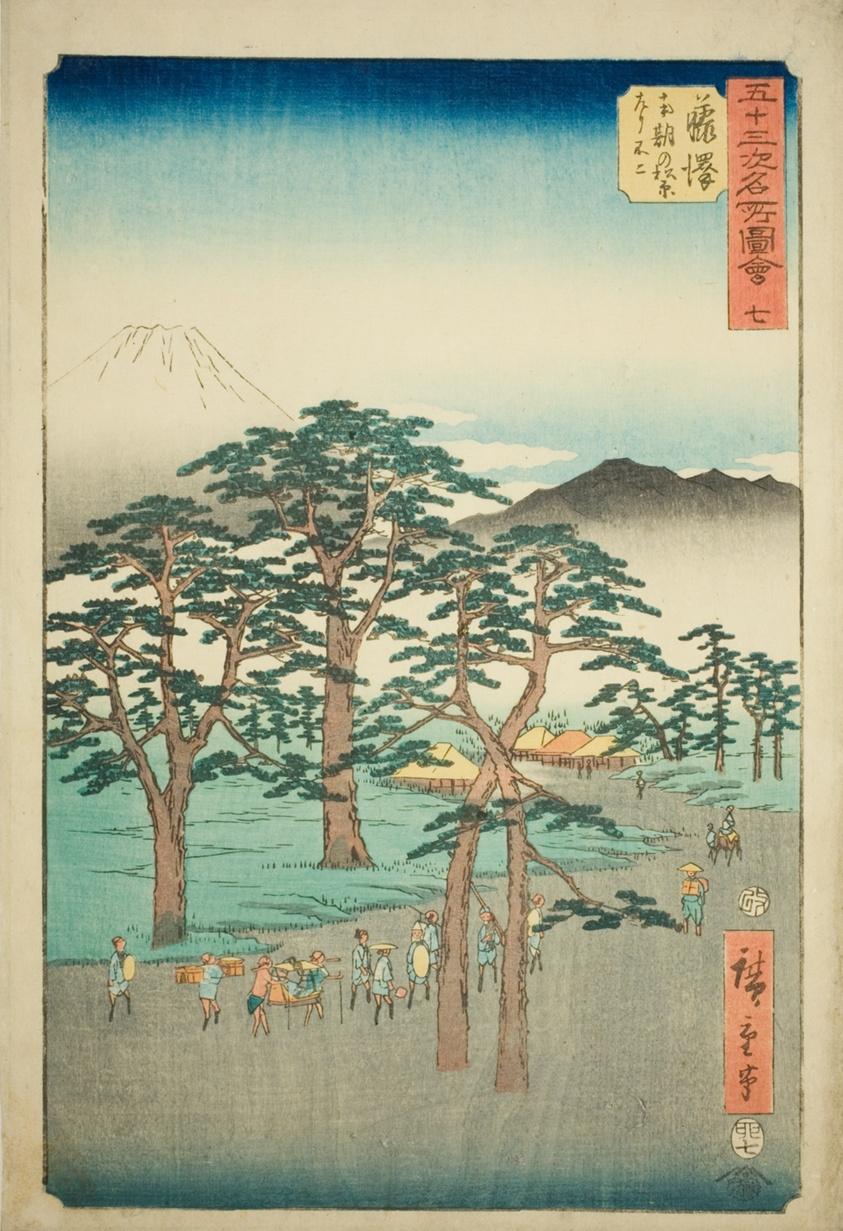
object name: Print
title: Fujisawa: Mount Fuji on the Left from the Nanki Pine Grove (Fujisawa, Nanki no Matsubara hidari no Fuji), no. 7 from the series "Famous Sights of the Fifty-three Stations (Gojusan tsugi meisho zue)," also known as the Vertical Tokaido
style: Japanese (culture or style)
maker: Utagawa Hiroshige 歌川 広重; Japanese, 1797-1858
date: 1855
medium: Color woodblock print; oban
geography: Japan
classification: woodblock print; print; asian art